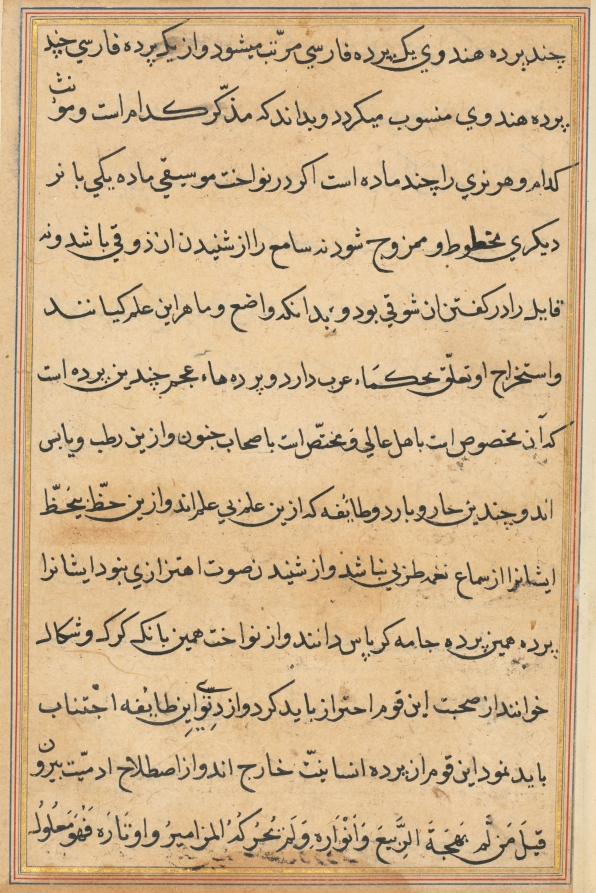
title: Page from Tales of a Parrot (Tuti-nama): text page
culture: Mughal India, court of Akbar (reigned 1556–1605)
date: c. 1560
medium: gum tempera, ink, and gold on paper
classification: Painting